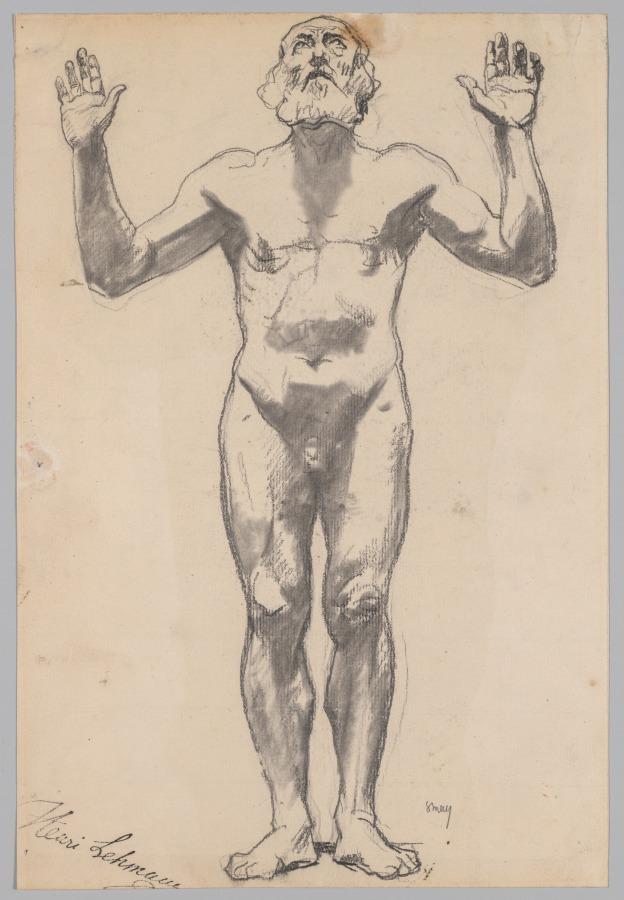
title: Nude Study of an Old Man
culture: France, 19th century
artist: Henri Lehmann (French, 1814–1882)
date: before 1852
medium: Graphite and stumping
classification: Drawing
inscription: lower right, in graphite: 8 May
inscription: verso: lower right corner, in graphite: #19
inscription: lower left corner: Henri Lehmann (L.1664g)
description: In preparation for executing largescale paintings, artists often produced studies of individual components of their compositions in order to work through their ideas. Lehmann made this figural study for a mural in the old Hôtel de Ville in Paris, destroyed by fire during the Commune in 1871. Here, the artist explored how to render deep shadows on the nude male body.